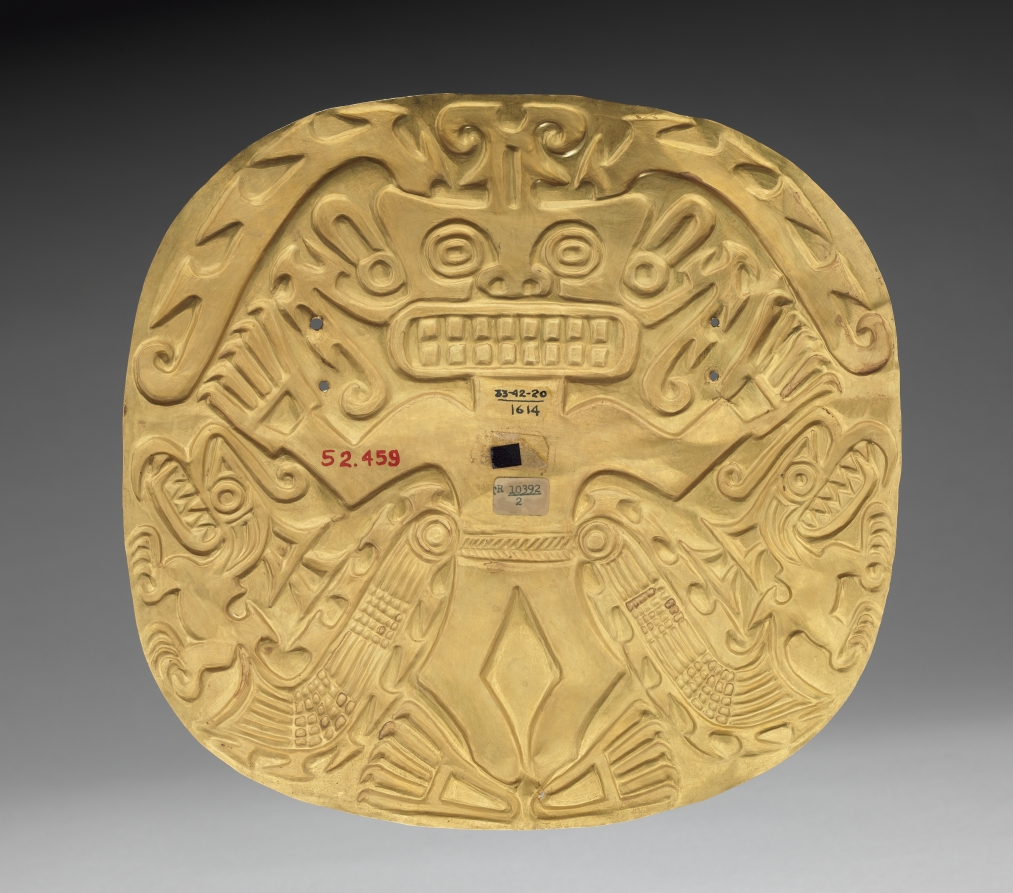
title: Pectoral (Chest Plaque)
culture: Intermediate Region, Panama, Conte style, 5th-10th Century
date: 400–900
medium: gold alloy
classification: Metalwork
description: Harvard archaeologists excavated this and seven other ornaments from several burials at Sitio Conte, a cemetery famous for its lavish graves of powerful chieftains. The young man buried in Grave 26 was such a chief. His status was stunningly memorialized by 21 human companions and 475 objects, many of them personal ornaments made of gold, including a large chest plaque and a rod-shaped ear ornament. The creature on the chest plaque, found close to the chief’s body, has reptile claws and perhaps the head crest of an iguana. Its meaning is unknown but perhaps, as in later periods, reptilian imagery and the warm gleam of gold linked rulers with the sun’s creative force.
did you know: Panning for gold was viewed as a sacred activity among the ancient inhabitants of Costa Rica and Panama.